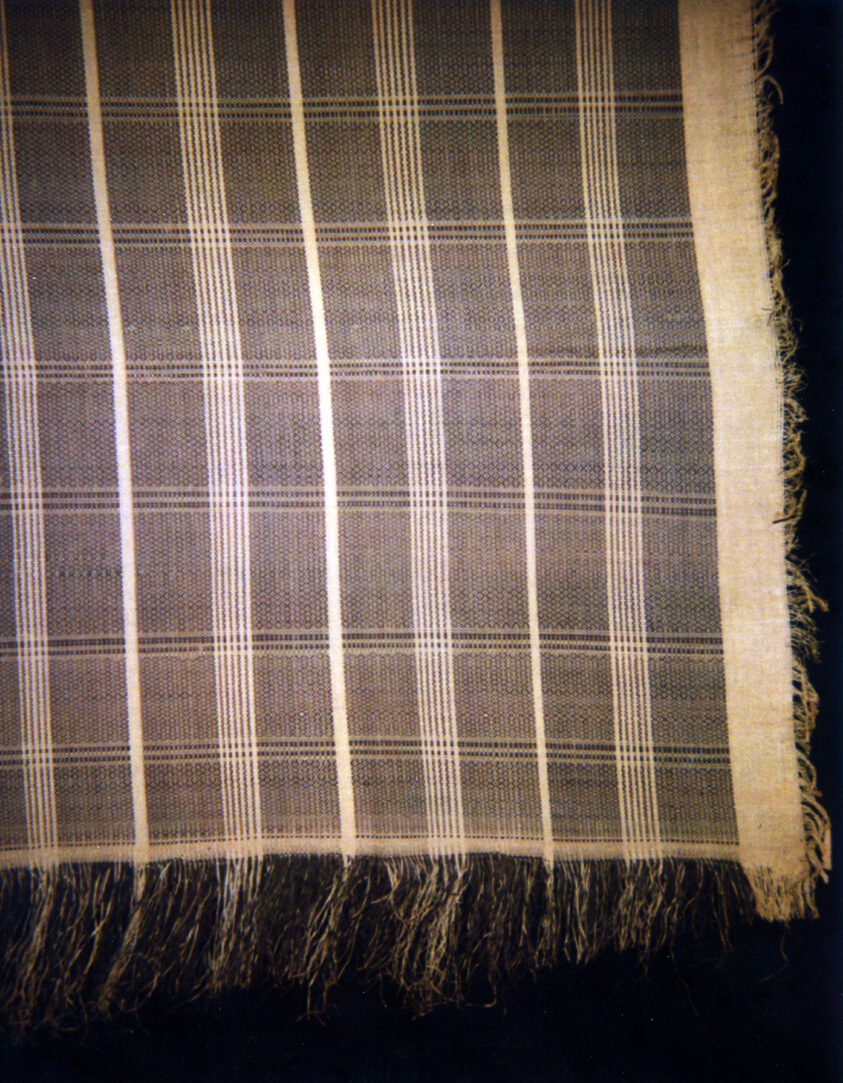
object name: Textile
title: Double Panel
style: mangbetu, Arts of Africa, african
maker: Possibly Mangbetu; Democratic Republic of the Congo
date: Mid–/late 19th century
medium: Raffia, stripes of plain 1:1 gauze crossings and bands of plain weave and complementary weft plain weave self-patterned by complementary ground weft floats with ground weft and knotted main warp fringe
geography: Democratic Republic of the Congo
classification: textile; weaving; arts of Africa